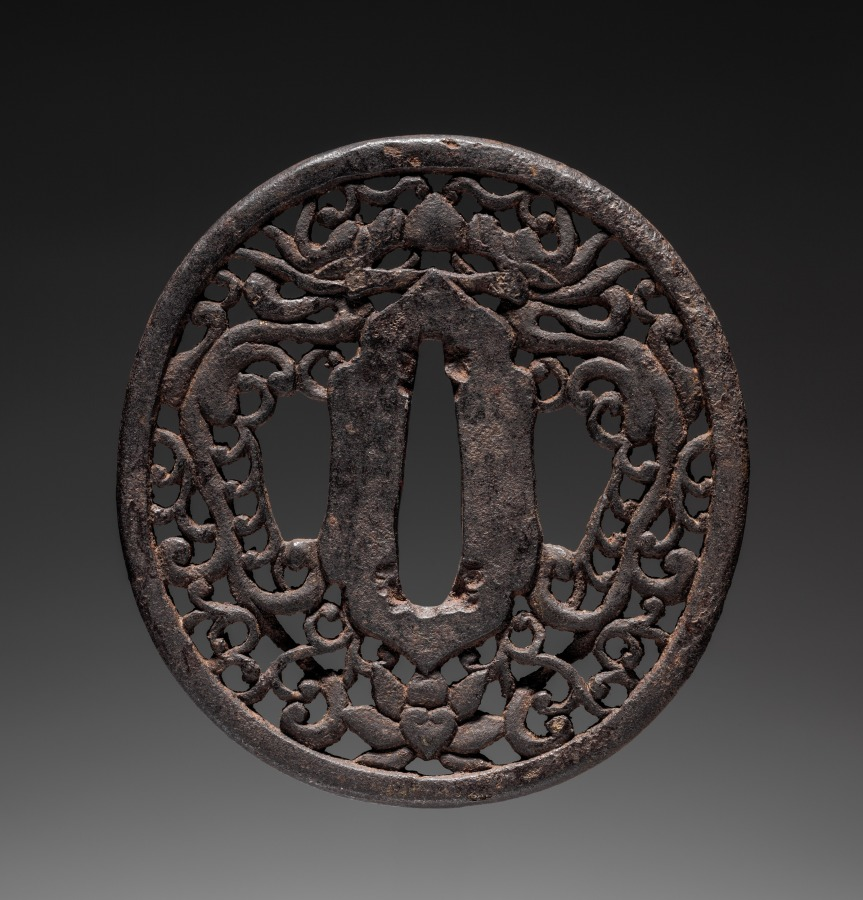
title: Sword Guard (Tsuba) with Dragons and Lotus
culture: Japan, possibly Edo period (1615-1868)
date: c. 1615–1868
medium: iron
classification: Arms and Armor